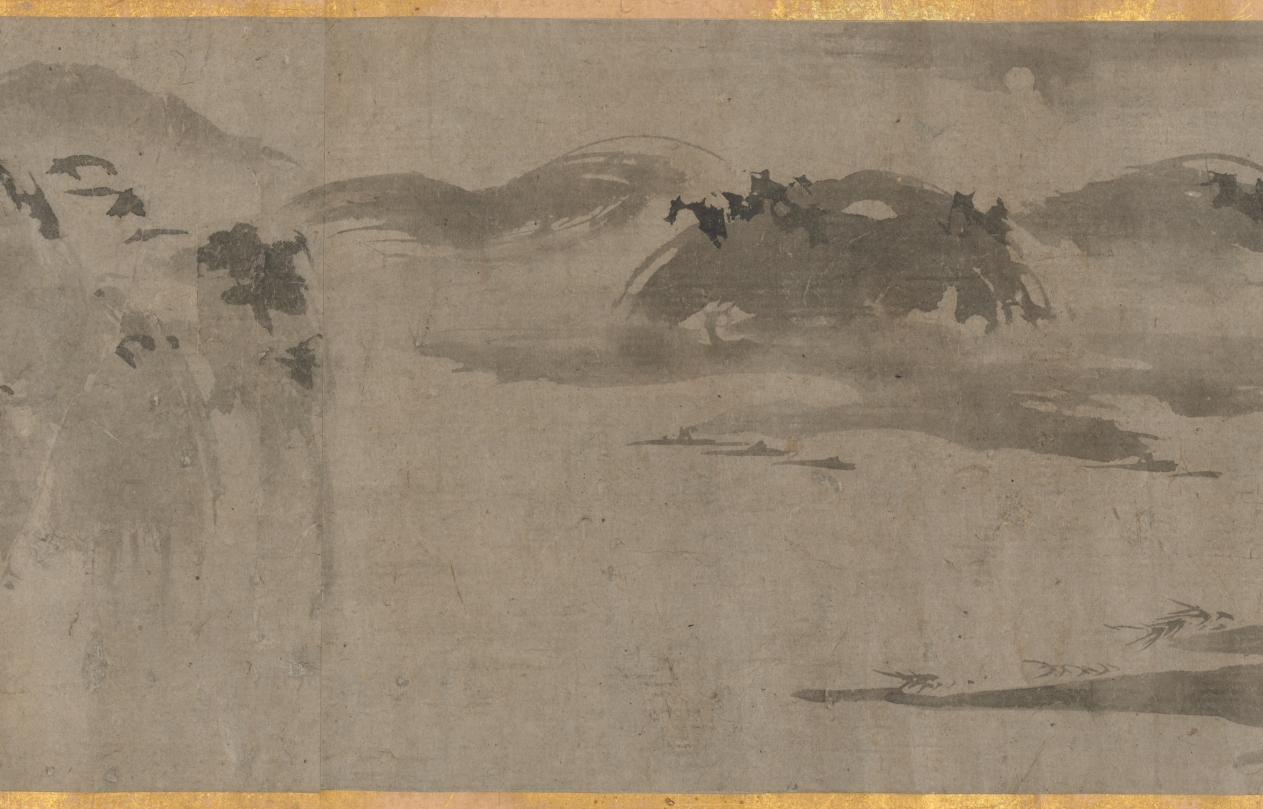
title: Eight Views of Xiao-Xiang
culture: Japan, Muromachi period (1392–1573)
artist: Sesson Shūkei (Japanese, c. 1492–c. 1577)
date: 1500s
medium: handscroll; ink on paper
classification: Painting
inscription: Signature and seal of artist at end of painting.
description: Eight Views of the Xiao and Xiang Rivers can be traced to 11th-century Chinese poems and paintings, the depiction of which had also become popular among Korean and Japanese painters. Xiao-Xiang refers to the region in present-day Hunan province where the Xiao and Xiang rivers converge. Few painters of the Eight Views had in fact seen the scenery; rather, they were trying to portray in ink and wash the lyrical qualities of dim light and a misty atmosphere typical of that region. Each of the poetic titles suggests a time of day, a season, or specific atmospheric conditions—subjects that challenged the abilities of the most talented artists. In this miniature painting (shukuzu) of the Muromachi period, Japanese Zen monk and painter Shukei Sesson depicted all eight views featured in Chinese prototypes: Wild Geese Descending to Sandbar; Returning Sails Off a Distant Coast; Mountain Market in Clearing Mist; River and Sky in Evening Snow; Autumn Moon over Dongting Lake; Night Rain on the Xiao and Xiang; Evening Bell from Mist-Shrouded Temple; and Fishing Village in Evening Glow.